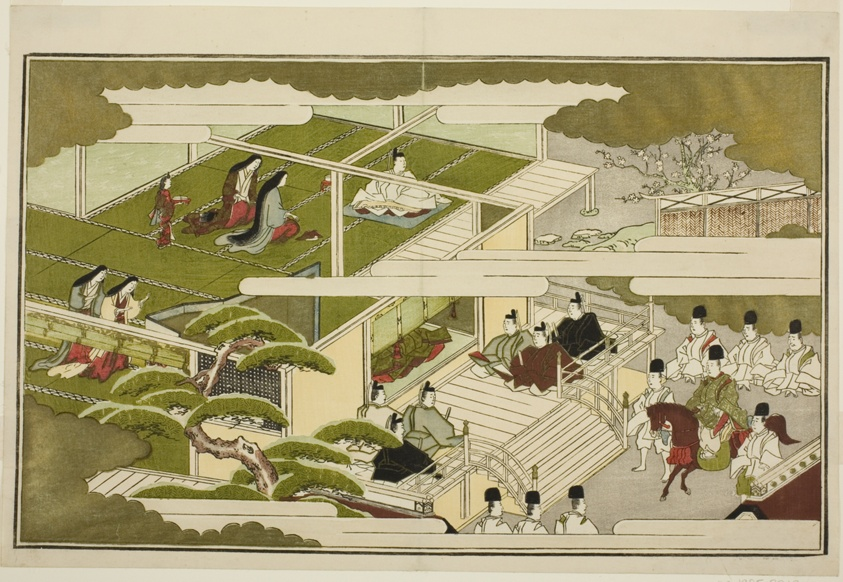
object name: Print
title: New Year at Court, from the illustrated kyoka anthology "The Young God Ebisu (Waka Ebisu)"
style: Japanese (culture or style)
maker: Kitagawa Utamaro 喜多川 歌麿; Japanese, 1753 (?)-1806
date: New Year, 1789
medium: Color woodblock print; double-page illustration from album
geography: Japan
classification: woodblock print; print; asian art